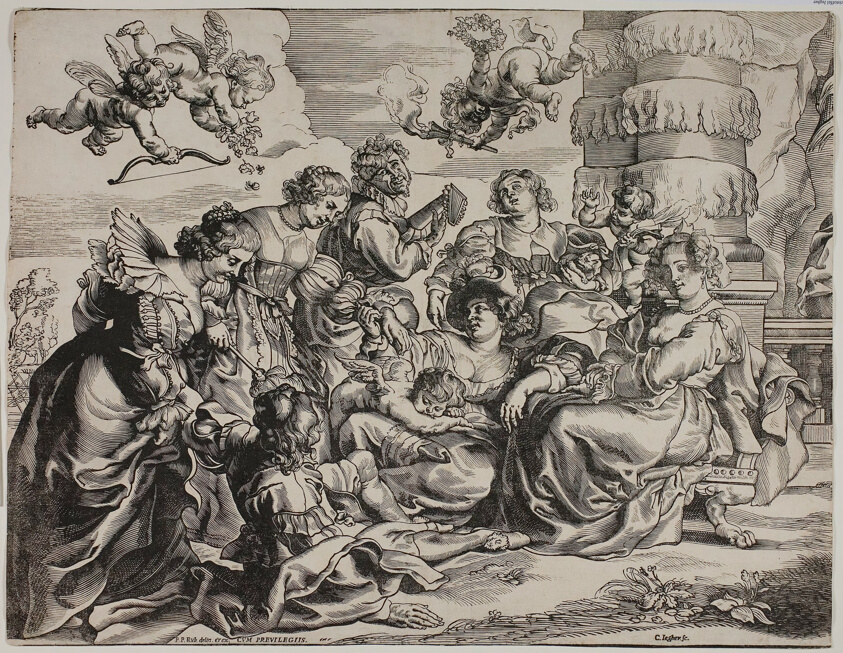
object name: Print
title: The Garden of Love, Left Half, with Seated Woman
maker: Christoffel Jegher (Flemish, 1596-1652/53); after Peter Paul Rubens (Flemish, 1577-1640)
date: c. 1631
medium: Woodcut on ivory laid paper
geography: Germany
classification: woodcut; print; prints and drawing